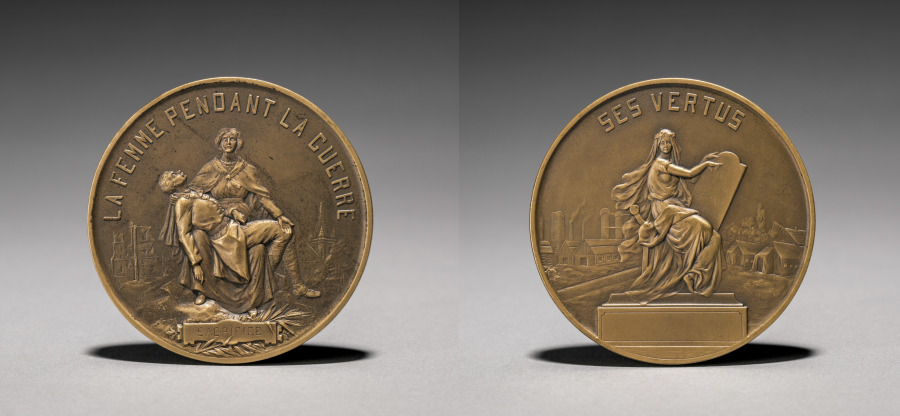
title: Medallion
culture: France, 19th-20th century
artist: Henri Emile Allouard (French, 1844–1929)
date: 1918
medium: bronze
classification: Metalwork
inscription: "Sacrifice. La femme pendant la Guerre" (woman during the war); signed: "H. Allouard 1918."